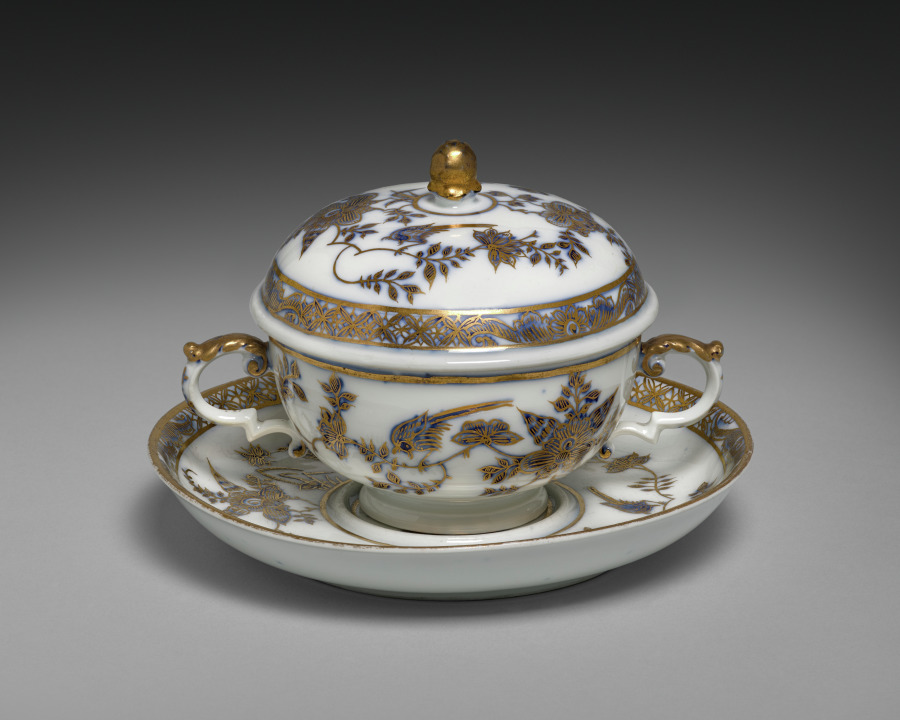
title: Covered Broth Bowl and Stand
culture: Germany, Meissen, 18th century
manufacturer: Meissen Porcelain Factory (German, est. c. 1710)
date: 1730–40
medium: gilt porcelain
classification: Ceramic